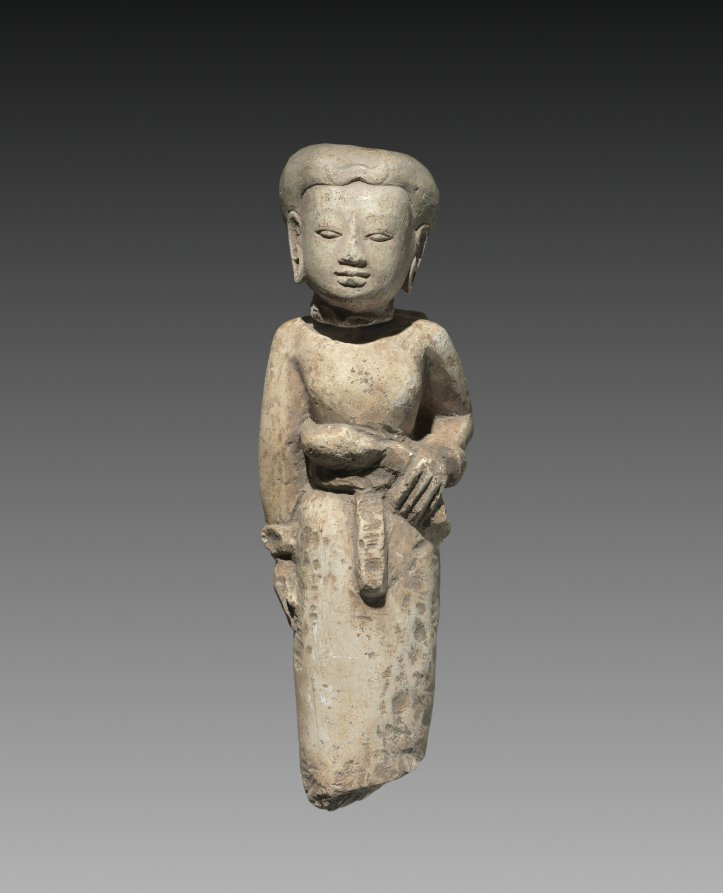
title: Female Figure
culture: Eastern Java, Majapahit Dynasty (1295-1478)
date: 1293–1478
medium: terracotta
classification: Sculpture